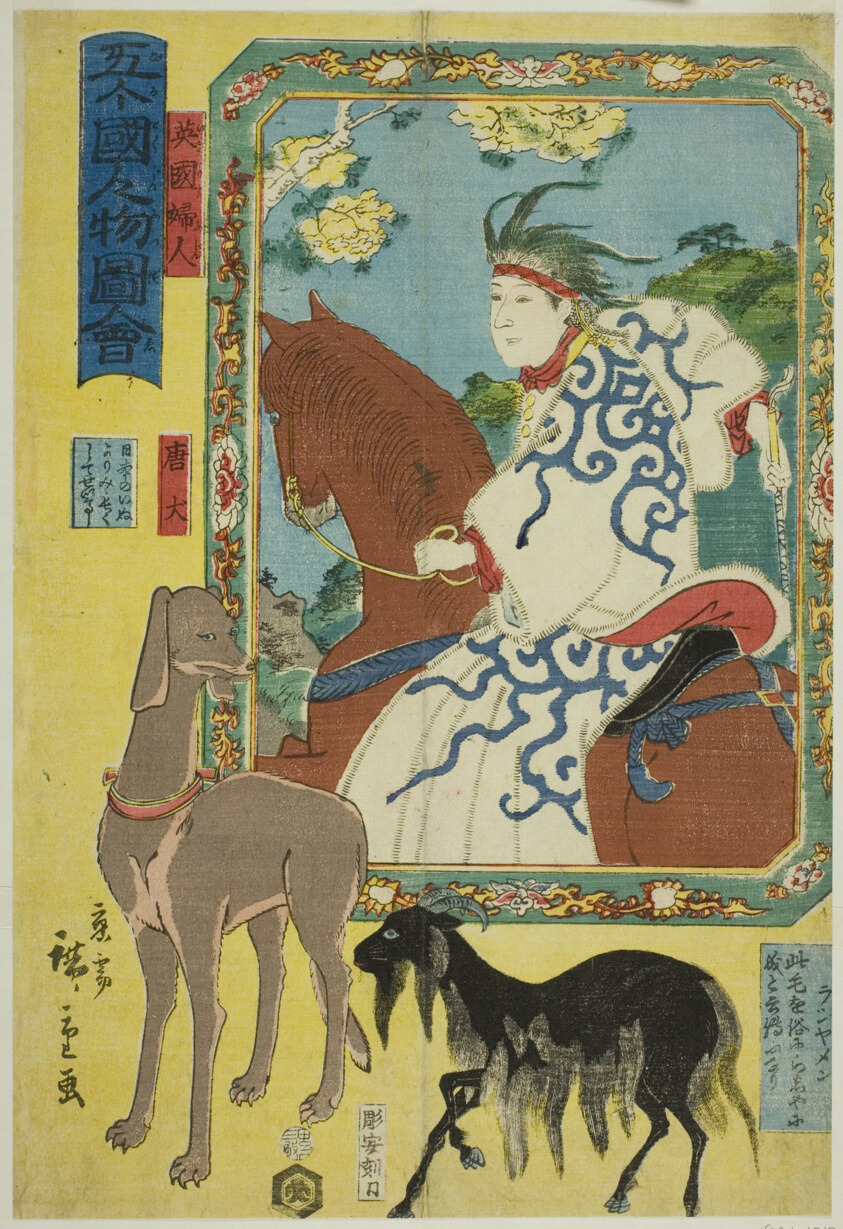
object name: Print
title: English Woman, Chinese Dog, and Sheep (Eikoku fujin, karainu, rashiyamen), from the series "People of the Five Nations (Gokakoku jinbutsu zue)"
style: Japanese (culture or style)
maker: Utagawa Hiroshige II (Shigenobu) (Japanese, 1826-1869)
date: 1860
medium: Color woodblock print; oban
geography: Japan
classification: woodblock print; print; asian art